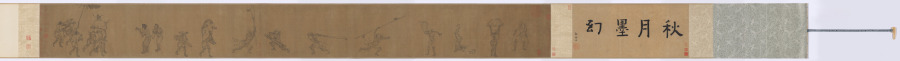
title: The Lantern Night Excursion of Zhong Kui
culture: China, Yuan dynasty (1271-1368)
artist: Yan Hui (Chinese, active 1270–1310)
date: late 1200s–early 1300s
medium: handscroll; ink and slight color on silk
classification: Painting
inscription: Artist's signature [and probable seal]: Yan Qiuyue 顏秋月 Title on frontispiece and 1 seal of Niu Shuyu 鈕樹玉 (1760–1827): Qiuyue mohuan 秋月墨幻 [Qiuyue's Ink Fantasy]. 31 additional seals: 2 of Yang Shiqi 楊士奇 (1365–1444); 2 of An Guo 安國 (1481–1534); 8 of Xiang Yuanbian 項元汴 (1525–1590); 2 of Geng Zhaozhong 耿昭忠 (1640–1686); 4 of Pu Tung 溥侗 (1870–1952); 7 of Tan Jing 譚敬 (1911–1991); 1 of Liu Ting-chih (20th c.); 5 unidentified.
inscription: An inscription by Zizhi Shanren 紫芝山人 [probably Jiang Hui 蔣惠], dated 1389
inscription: An inscription by Wu Kuan 吳寬 (1436–1504)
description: Here, the demon queller Zhong Kui leads a nightly procession of street entertainers with bare, muscular bodies and demonic faces. Some wear shabby clothes, and all perform stunts and tricks to astound and scare the viewer. In fact, a New Year custom in cities of southeast China had the poor, disguised as demons, process through the streets and play their tricks to clear households of evil spirits and welcome the spring. From right to left, a demonic figure leads the procession and beats a drum; another lifts a large rock; one stands on his hands trying to drink; one balances a jar on his elbow; three hold and wield weapons; one carries a folded chair covered by a cow’s skin; another holds Zhong Kui’s qin (zither), books, brush, and inkstone. At the end of the scroll, two figures offer a cup and bottle of wine to Zhong Kui, who lifts his hand in command.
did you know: Zhong Kui was an ancient ghostbuster.